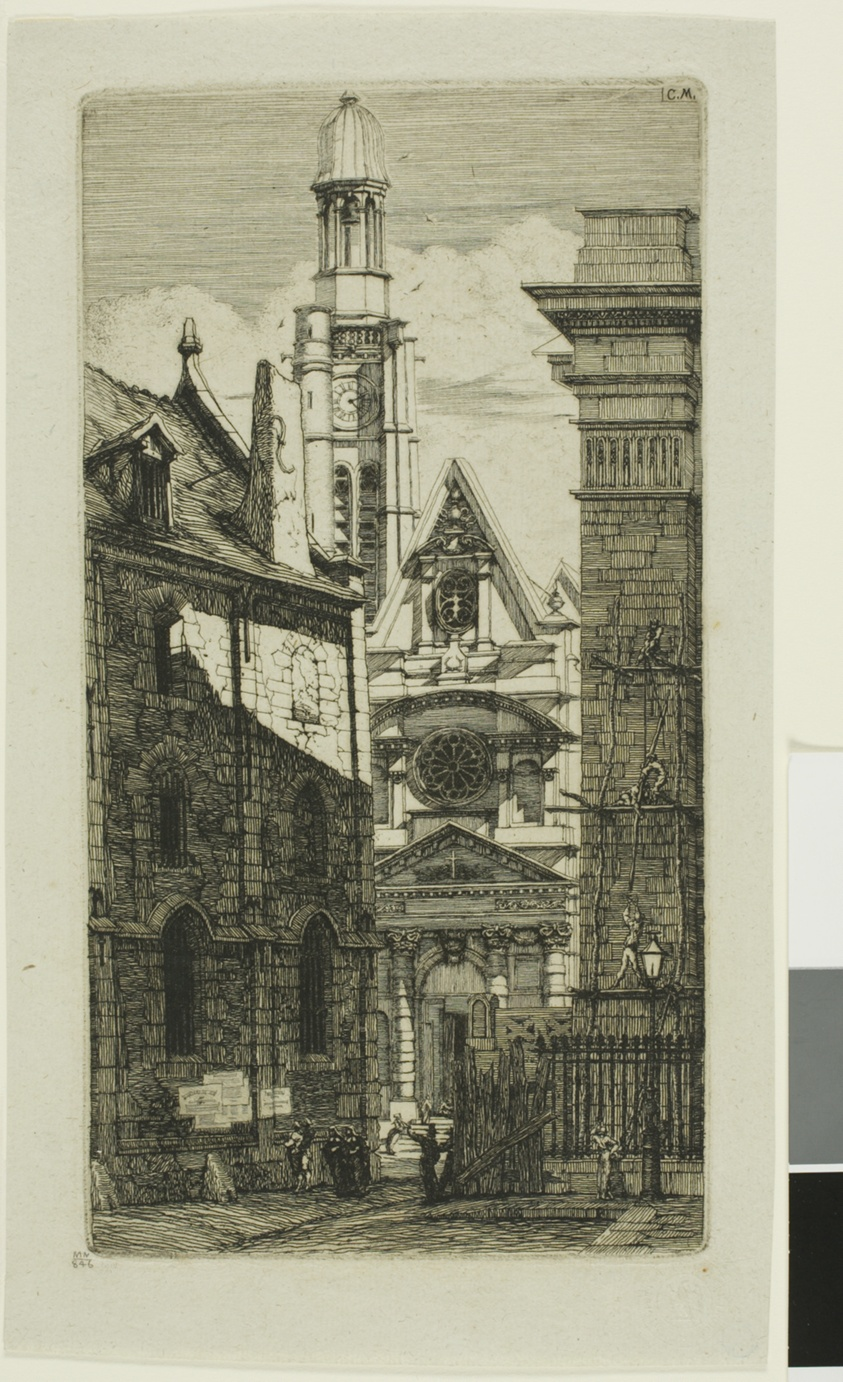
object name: Print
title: Church of St. Etienne du Mont, Paris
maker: Charles Meryon (French, 1821-1868)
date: 1852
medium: Etching on verdâtre (greenish) laid paper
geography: France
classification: etching; print; prints and drawing